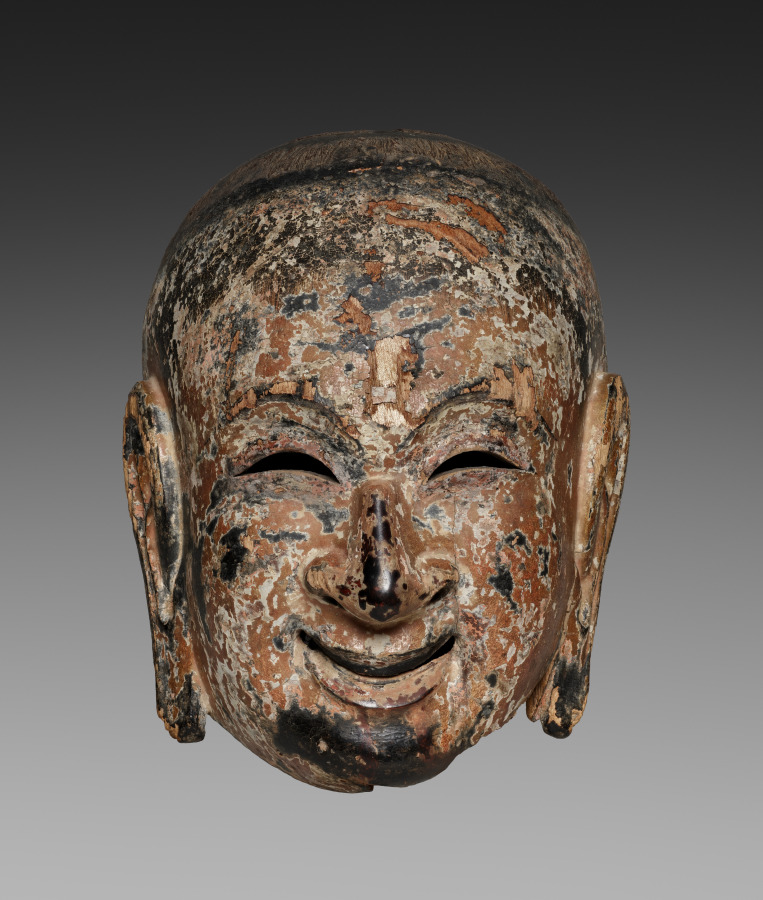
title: Gigaku Mask of Young Persian Boy (Taikōji)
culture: Japan, Nara period (710–94)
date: 710–94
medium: paulownia wood, lacquered and painted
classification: Sculpture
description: This mask is for the role of the son of an old Persian widower in gigaku, a theatrical dance repertoire imported to Japan from continental Asia during the seventh century. The old man and his sons mime prayers to the Buddha. While the mask would cover the entire head of the actor, there are openings for the eyes, nostrils, and mouth.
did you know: This is the mask for one of two sons who accompany a widower in ancient dance theater.